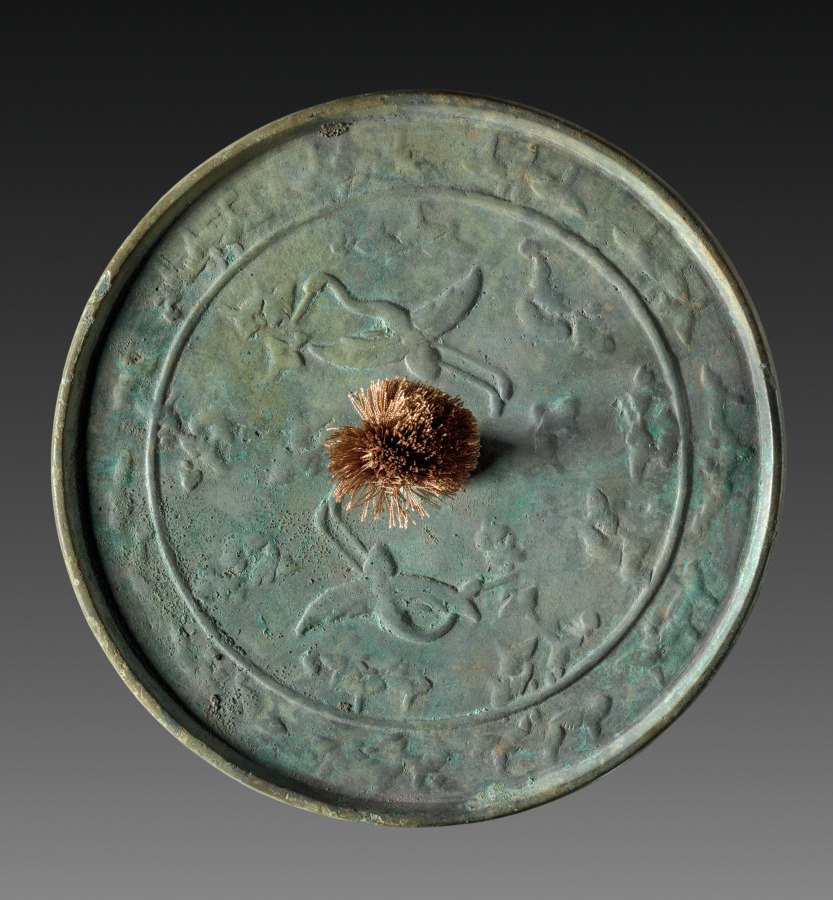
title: Mirror with Pair of Cranes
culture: Japan, Muromachi period (1392–1573)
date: 1392–1573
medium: bronze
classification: Metalwork